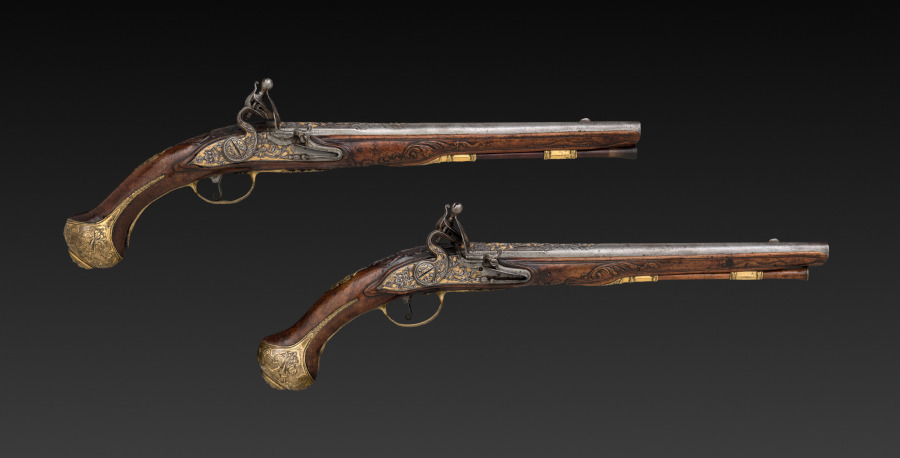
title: Pair of Flintlock Pistols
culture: Franco-Flemish, Liège, early 18th century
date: early 1700s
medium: steel with gold inlay, gilt-brass mounts; walnut burl stock; chiseled high-relief decoration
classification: Arms and Armor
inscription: G. MASSIN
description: Works of exquisite craftsmanship, this pair of pistols, on view in the museum’s armor court, feature an array of decorative elements, including carved walnut, gold inlay, and chiseled, engraved, and gilded figural designs. The barrel is signed G. MASSIN, the name of a gunsmith working in eastern France or French-speaking Flanders, possibly the city of Liège.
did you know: The flintlock ignition system was developed in the 1600s and remained the dominant system until the early 1800s.